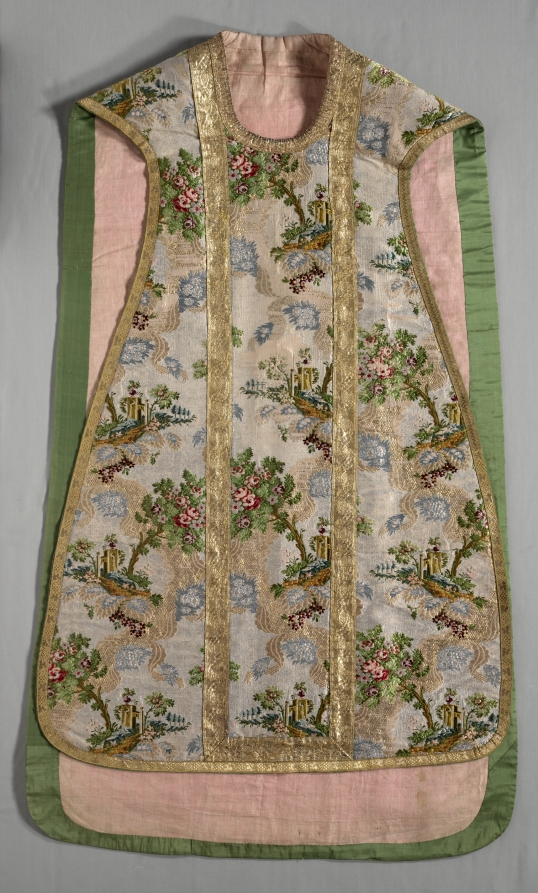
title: Chasuble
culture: France, Lyon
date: c. 1760–70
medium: taffeta, brocaded; silk, silver, and gold thread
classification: Textile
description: This costly woven silk with brilliant strips of gold foil features landscapes with blossoming trees and architecture, motifs that were popular by the 1760s. Its asymmetrical pattern suggests it was designed as a furnishing fabric rather than for clothing. Perhaps it was donated by a faithful parishioner to be made into an ecclesiastical vestment in a well-established practice.